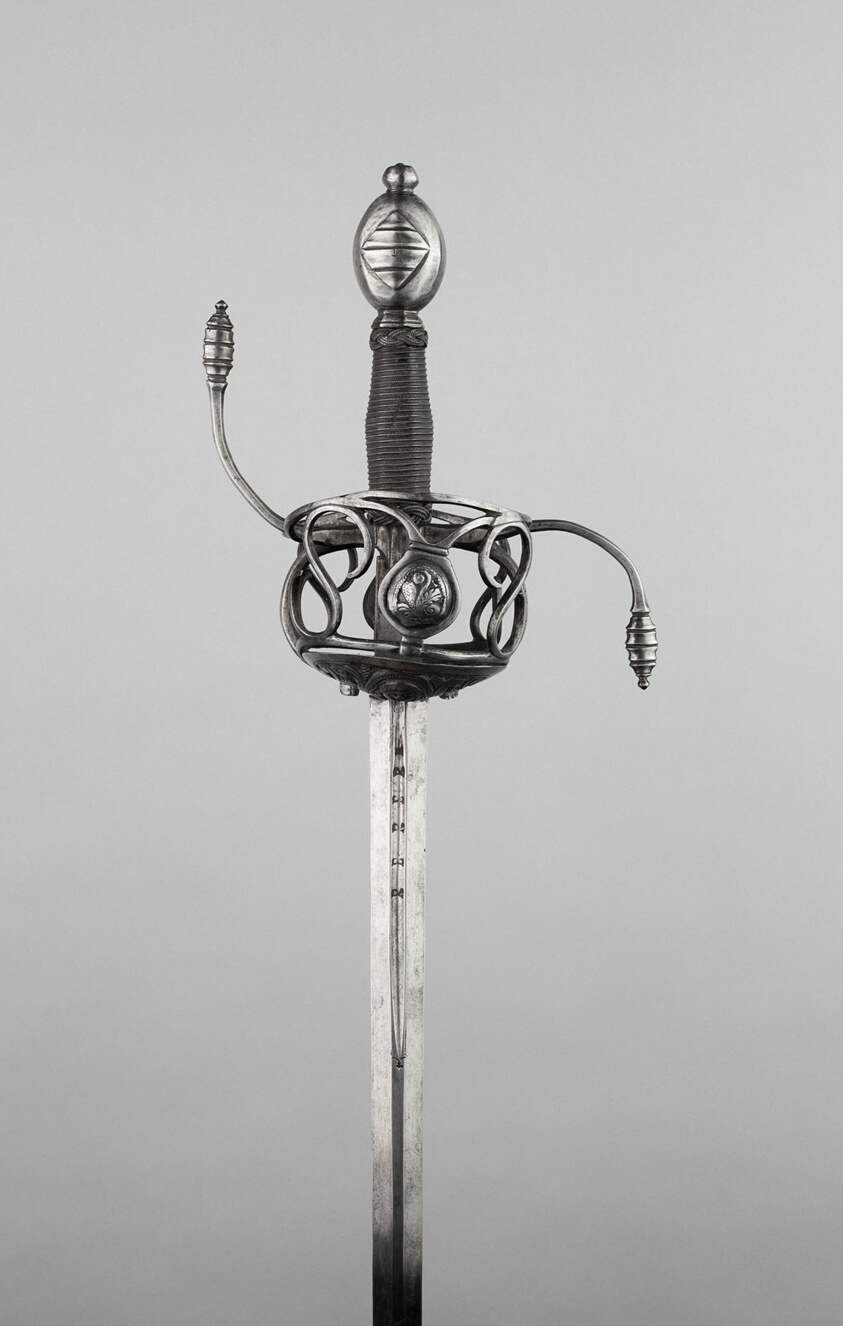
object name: Arms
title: Rapier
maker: Western European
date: 1630-40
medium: Steel, iron, and wood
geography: Western Europe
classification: edged weapon-sword; arms; arms and armor